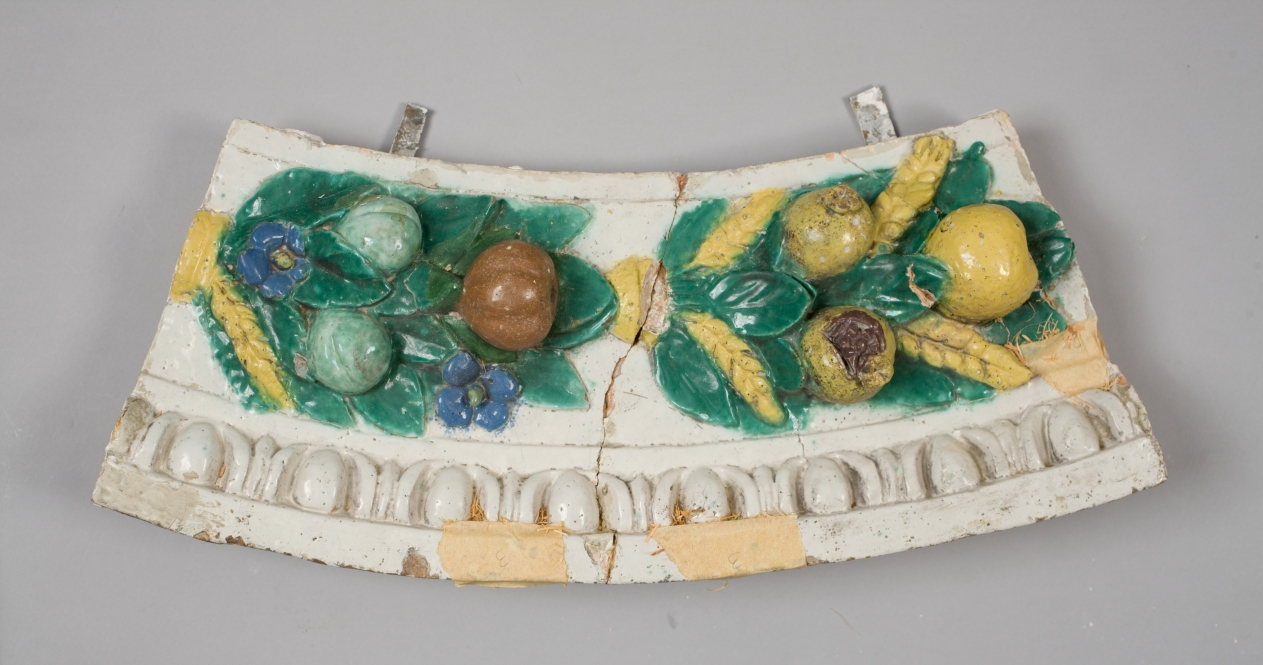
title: Fragment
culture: Italy, Florence, 16th century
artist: Benedetto Buglioni (Italian, 1461–1521)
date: c. 1900–1910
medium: glazed terracotta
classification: Sculpture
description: The Madonna sits upon a throne with the Christ Child standing on her knee. He is steadied by his mother, turning delicately to grasp the Virgin's robe for support. On the left is St. Francis, identified by his stigmata. On the right, St. Anthony Abbot is identified by his monk's robe and T-shaped walking stick. The brown robes of the saints, the purple of the Virgin's tunic (a shade characteristic of the artist), and the flesh tones of the figures contrast strongly against the bright blue background. In the semicircular sky behind the figures, three winged cherub heads emerge, representing a host of angels. The inclusion of St. Francis in this altarpiece honors the saint, suggesting that the altarpiece may have been originally built into the wall of a Franciscan institution in Tuscany. Two shields bearing the Borgherini family crest appear in the lower portion of the altarpiece's border, further suggesting that the chapel for which this altarpiece was made was likely owned or endowed by the family. Glazed terracotta is both durable and decorative and the gleaming white of this piece would have stood out in the darkness of a church. The medium was made popular by Renaissance artist Luca della Robbia and came into fashion as a substitute for expensive carved marble. A rounded arch frame embellished with fruit and flower garlands as well as egg-and-dart and cord moldings accompanied the work when it was acquired, but was later determined not to be original and removed. Buglioni's work bears the influence of the della Robbias, particularly in the simple color scheme. Buglioni likely worked in the studio of Luca's nephew, Andrea, where he would have learned the technique of glazing terracotta.